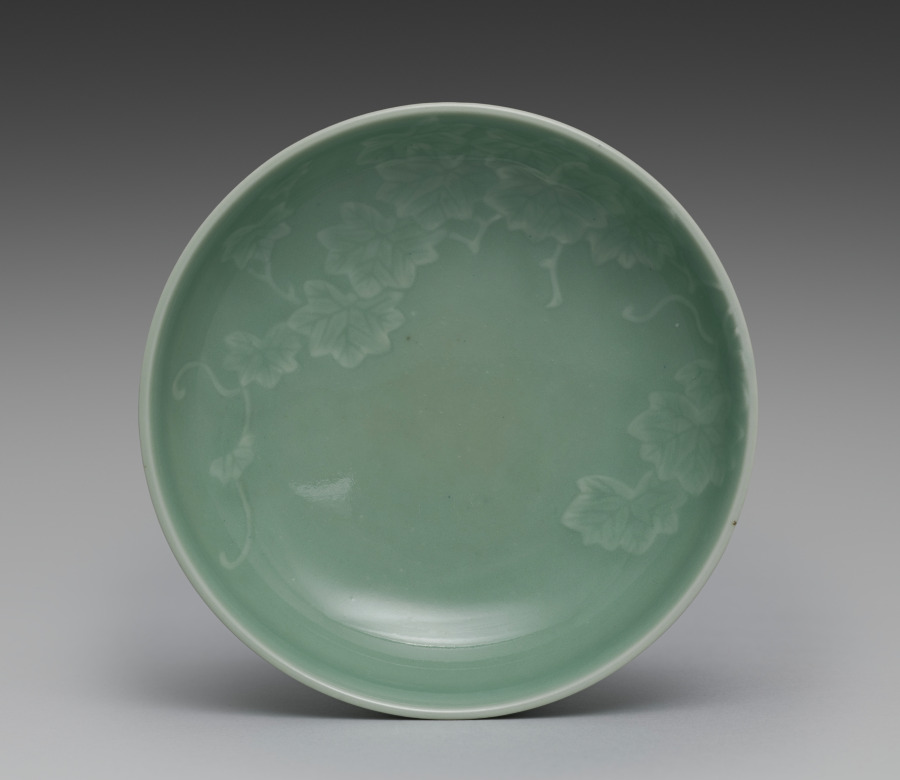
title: Dish from Dishes with Ivy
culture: Japan, Meiji period (1868–1912)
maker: Seifū Yohei III (Japanese, 1851–1914)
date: 1893–1914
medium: One from a set of five dishes; porcelain with green glaze and molded designs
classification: Ceramic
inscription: 清風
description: Yohei III’s main output for his sophisticated clientele was in the form of tea sets and dining sets. He often produced in pairs, sets of five, or sets of ten. This set of five dishes with a green glaze and designs of ivy vines in very low relief has unfortunately lost its box. These dishes are slightly larger than the other dishes, like CMA 2022.187, and so may have been not saucers but rather small plates for meals.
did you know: In his career, Seifū Yohei III created a range of dishes in green glazes.